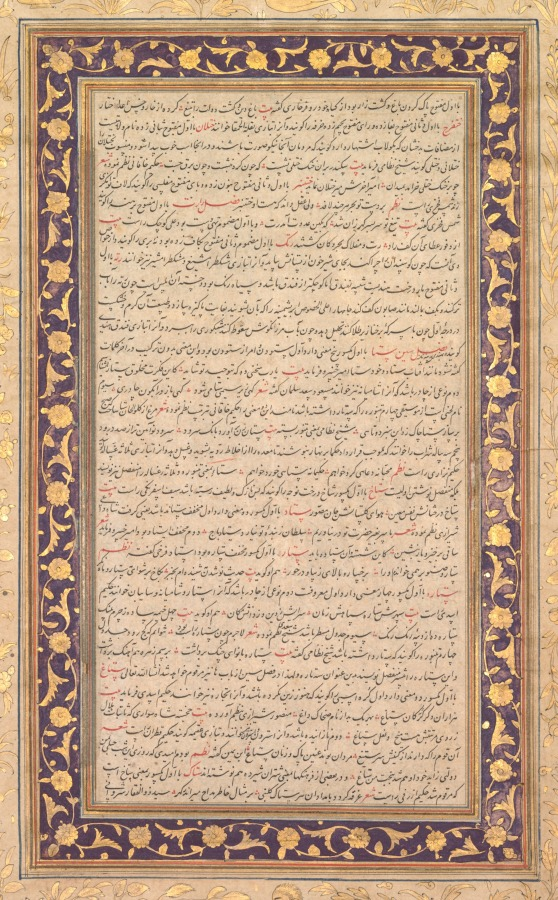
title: Circumcision ceremony for Akbar’s sons, painting 126 from an Akbar-nama (Book of Akbar) of Abu’l Fazl (Indian, 1551–1602)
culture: Mughal India, court of Akbar (reigned 1556–1605)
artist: attributed to Dharam Das (Indian, active c. 1580–1605)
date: c. 1602–3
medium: gum tempera, ink, and gold on paper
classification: Painting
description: This page is from a copy of the biography of Akbar that was completed not long before his death in 1605. It depicts him much younger, during the festivities held on October 22, 1573, in his newly built capital city of Fatehpur Sikri, near Agra, on the occasion of the circumcision ceremony for his three young sons. Dancers in Chaghatai Turkish dress perform as Akbar’s weight in gold is being distributed to the poor. Akbar wears a simple white tunic, or jama, stained at the armpits by aromatic musk. A curved dagger in a red velvet sheath is tucked into his golden sash, and he is crowned with a white crested turban.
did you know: An attendant strokes Akbar’s hunting falcon, perched on a glove.